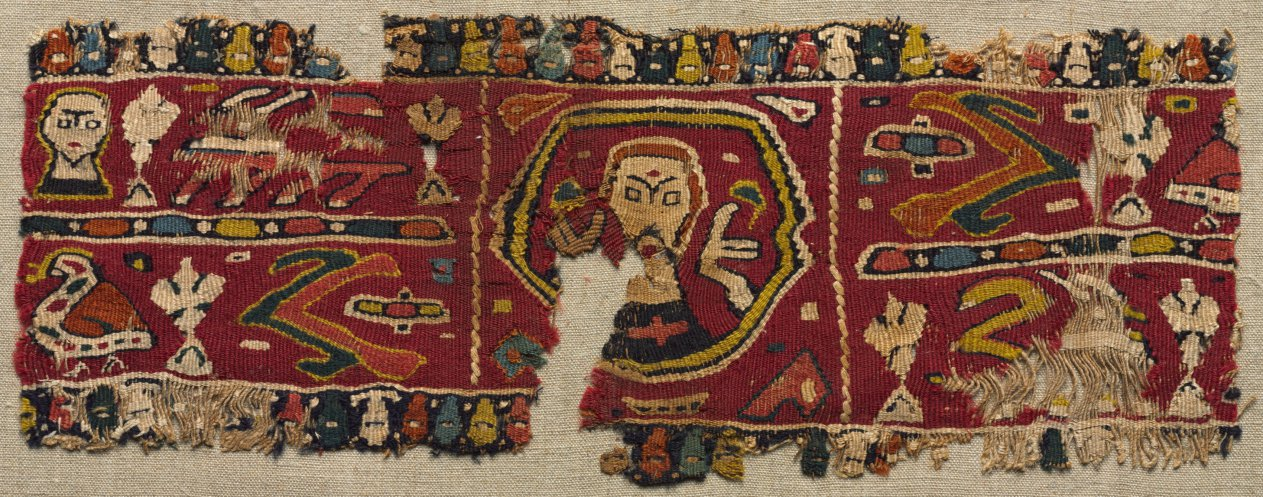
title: Sleeve Band from a Tunic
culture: Egypt, Abbasid period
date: late 700s - early 800s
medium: tapestry; wool and linen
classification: Textile